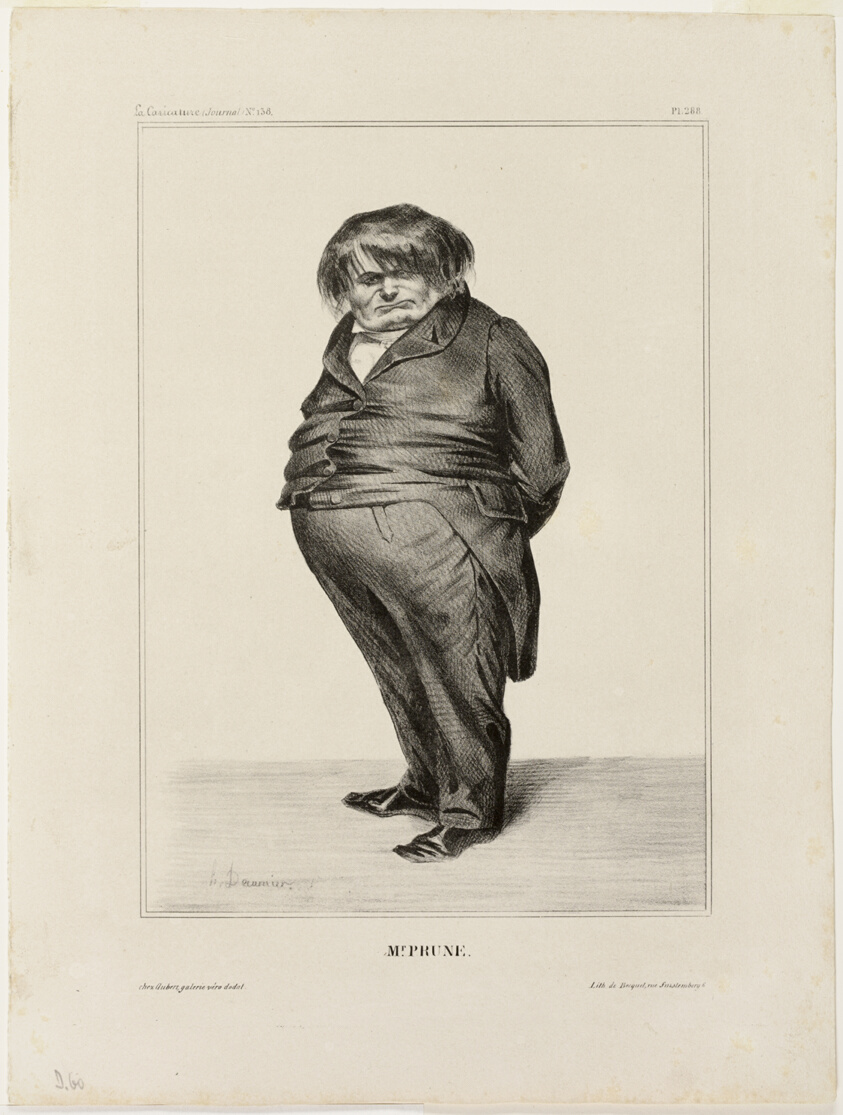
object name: Print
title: Mr. Prune, plate 288 from Célébrités de la Caricature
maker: Honoré Victorin Daumier; French, 1808-1879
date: 1833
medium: Lithograph in black on ivory wove paper, together with four pages of text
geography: France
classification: lithograph; print; prints and drawing